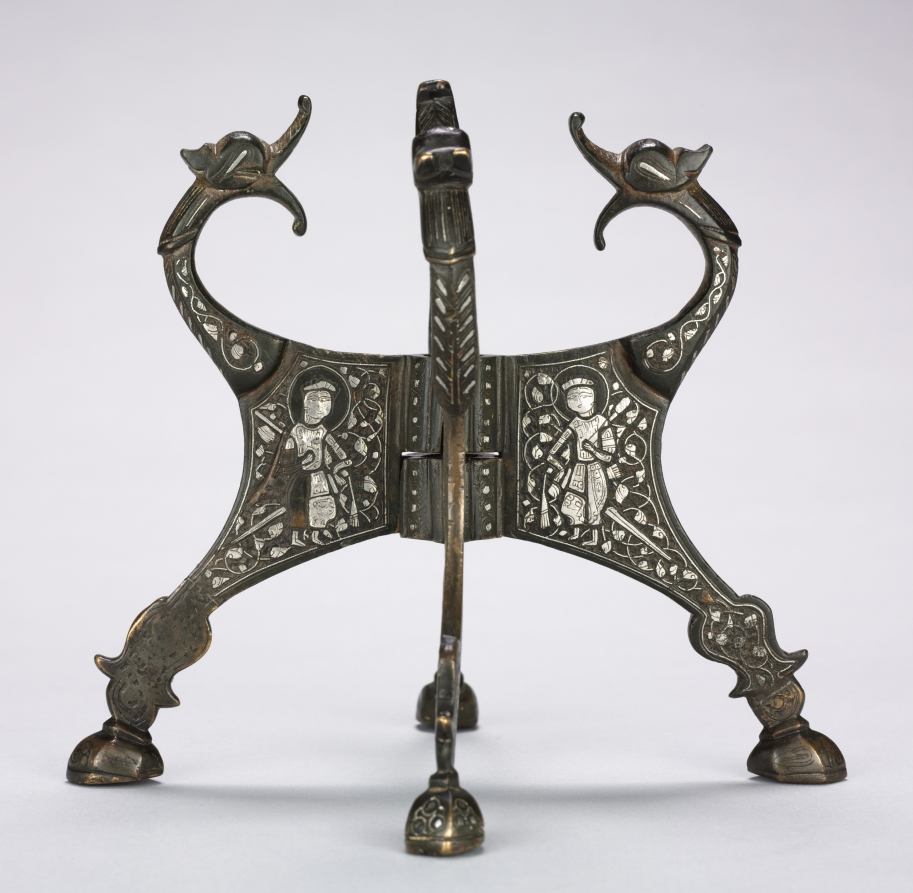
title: Dragon-headed Stand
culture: Northern Iraq or Syria, Zangid (1127–1251) or Ayyubid period (1171–1260)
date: 1200s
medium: cast brass inlaid with silver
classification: Metalwork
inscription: None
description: Themes of hunting and combat are evoked by this stand with gaping dragon heads and figures armed with swords and spears.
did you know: The four-legged stand has two interlocking parts.